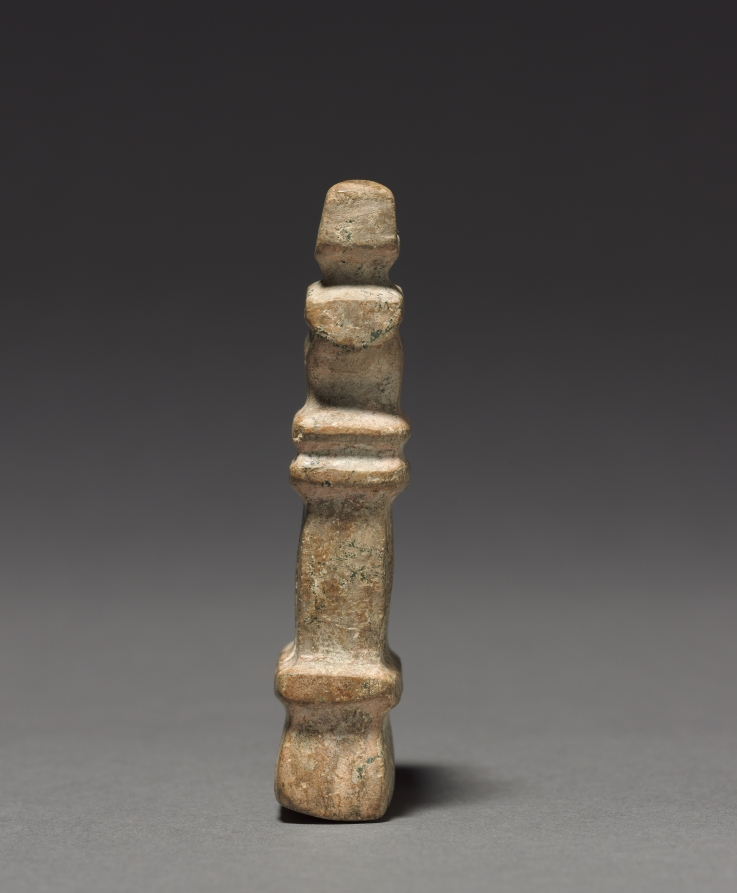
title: Architectural Model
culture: Mesoamerica, Mexico, Guerrero, Mezcala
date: 100 BCE–300 CE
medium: serpentine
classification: Sculpture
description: The Mezcala style takes its name from a river in its homeland, the Guerrero region of western Mexico. The style is known for small-scale stone sculptures including architectural “models” characterized by sleek abstraction. Because comparisons to actual architecture in the Mezcala region are scarce, it is not known whether the models refer to temples, houses, or underground funerary structures.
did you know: The Mezcala style was first recognized and defined in 1956.